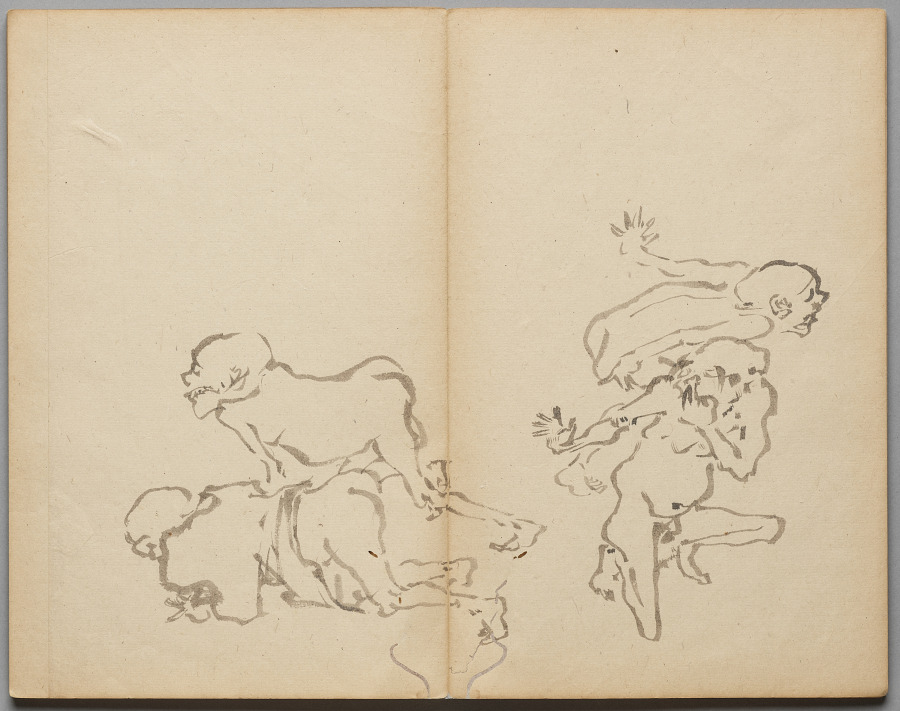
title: Seniors' Farting Contest from Sketch Album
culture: Japan, Edo period (1615–1868) to Meiji period (1868–1912)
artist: Kawanabe Kyōsai (Japanese, 1831–1889)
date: mid- to late 1800s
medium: Accordion-style book of 26 double-leaves; ink and color on paper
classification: Bound Volume